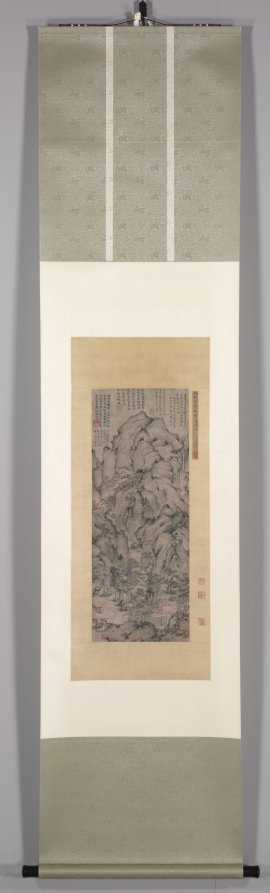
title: Streams and Mountains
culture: China, Yuan dynasty (1271-1368)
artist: Xu Ben (Chinese, 1335–1380)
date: 1372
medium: hanging scroll, ink on paper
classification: Painting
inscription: 綠樹黃鸝處處山， 偶從谿上看雲還。/ 人生未許全無事， 纔得登臨便是閑。 壬子七月十日徐賁為吉夫先生畫 並詩共上 [印] 幼文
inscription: Label on mounting probably by Liang Qingbiao 梁清標 (1620–1691).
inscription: 4 additional inscriptions and 9 additional seals: 1 poem of Xie Hui 謝徽 (c. 2nd half 14th c.); 1 poem and 1 seal of Gao Qi 高啟 (1336–1374); 1 poem and 1 seal of Lu Zhen 盧貞 (c. late 14th c.); 1 poem of Huang Zai 黃載; 3 seals of Liang Qingbiao 梁清標 (1620–1691); 1 seal of Wang Jiqian [C. C. Wang] 王季遷 (1907–2003); 3 seals unidentified.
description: Like many literati of the late Yuan and early Ming dynasties, Xu Ben was entangled with the perils of dynastic change as well as the ups and downs of his official career. It was mainly through the art of painting and poetry, as well as the ideal of reclusion, that he sought feelings of exhilaration and shared them with his friends. Xu created this monumental landscape during one of his periods of reclusion. His innumerable “hemp-fiber” texture strokes create a unifying rhythm among the towering mountains with tightly knit masses of rocks. Nestled among shady trees at the base of the mountain is a rustic retreat, which a scholar approaches on foot to visit with the hermit. Among the five inscriptions at the top of the painting is one by the artist himself. He dedicated the painting to someone named Jifu 吉夫 and recorded a poem in praise of mountains. Green trees, yellow orioles, everywhere are mountains; Aimlessly I return from the stream, where I watched the clouds. Man's life does not allow unbroken ease, But to be able to be high up in the mountain, this is leisure.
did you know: An attendant opens a reed gate to welcome the scholar with a walking stick approaching the rustic retreat.